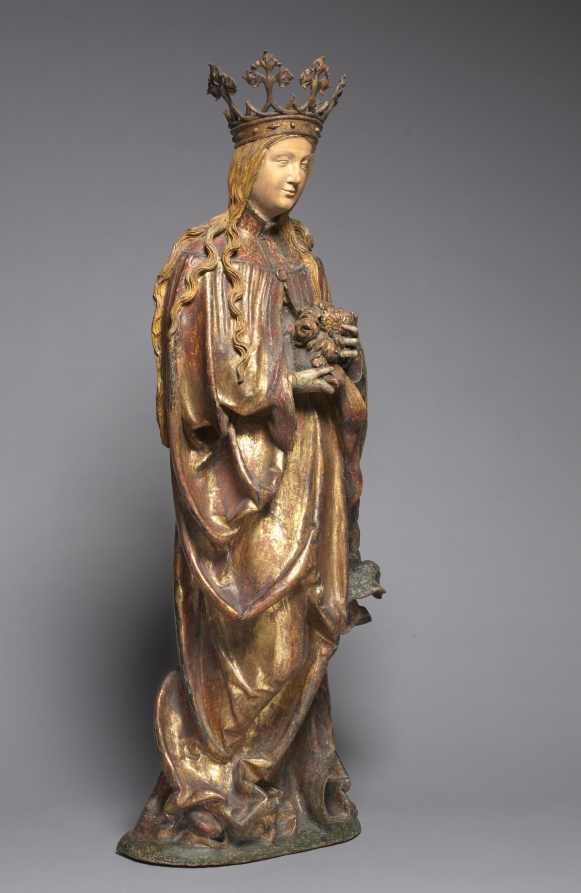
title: Saint Elizabeth of Hungary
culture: Germany, Bavaria, 16th century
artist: Mätthaus Kreniss (German)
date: c. 1515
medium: lindenwood with polychromy and gilding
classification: Sculpture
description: Saint Elizabeth was born in 1207, the daughter of Andreas II, King of Hungary; her crown alludes to her royal birth. Many legends about her generosity and work on behalf of the poor were circulated in the Middle Ages, among them the subject of this sculpture: food she was carrying to the poor was miraculously changed to roses to avoid discovery by her husband. Much of the original paint and gilding is preserved on this sculpture except the face, which had been stripped and repainted in heavy oils prior to its acquisition by the museum. This modern paint has been removed.